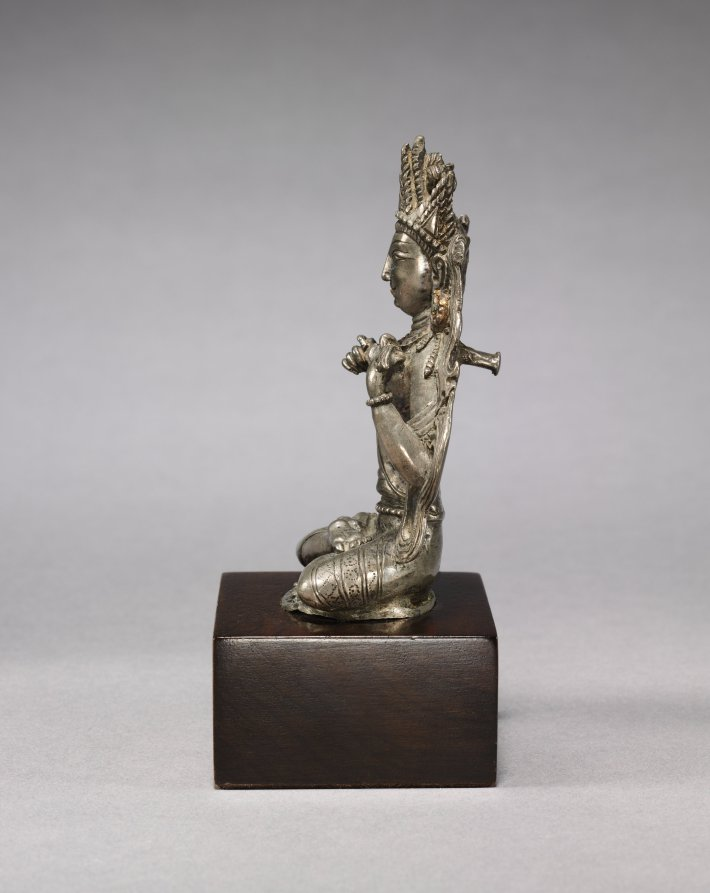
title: Bodhisattva Vajraraksha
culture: Western Tibet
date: c. 900s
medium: silver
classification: Sculpture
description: Once part of a set of sculptures depicting the enlightened beings who occupy a perfect world called the Diamond Realm (Vajradhatu), this figure holds the collar of his jacket in a gesture specific to him. An important practice in Tibetan Buddhism is the visualization of the Diamond Realm as described in texts and aided by artistic representations called mandalas. Bodhisattva Vajraraksha sits in the northern quadrant as a subsidiary figure to the Buddha Amoghasiddhi, who is green in color and quells fear.